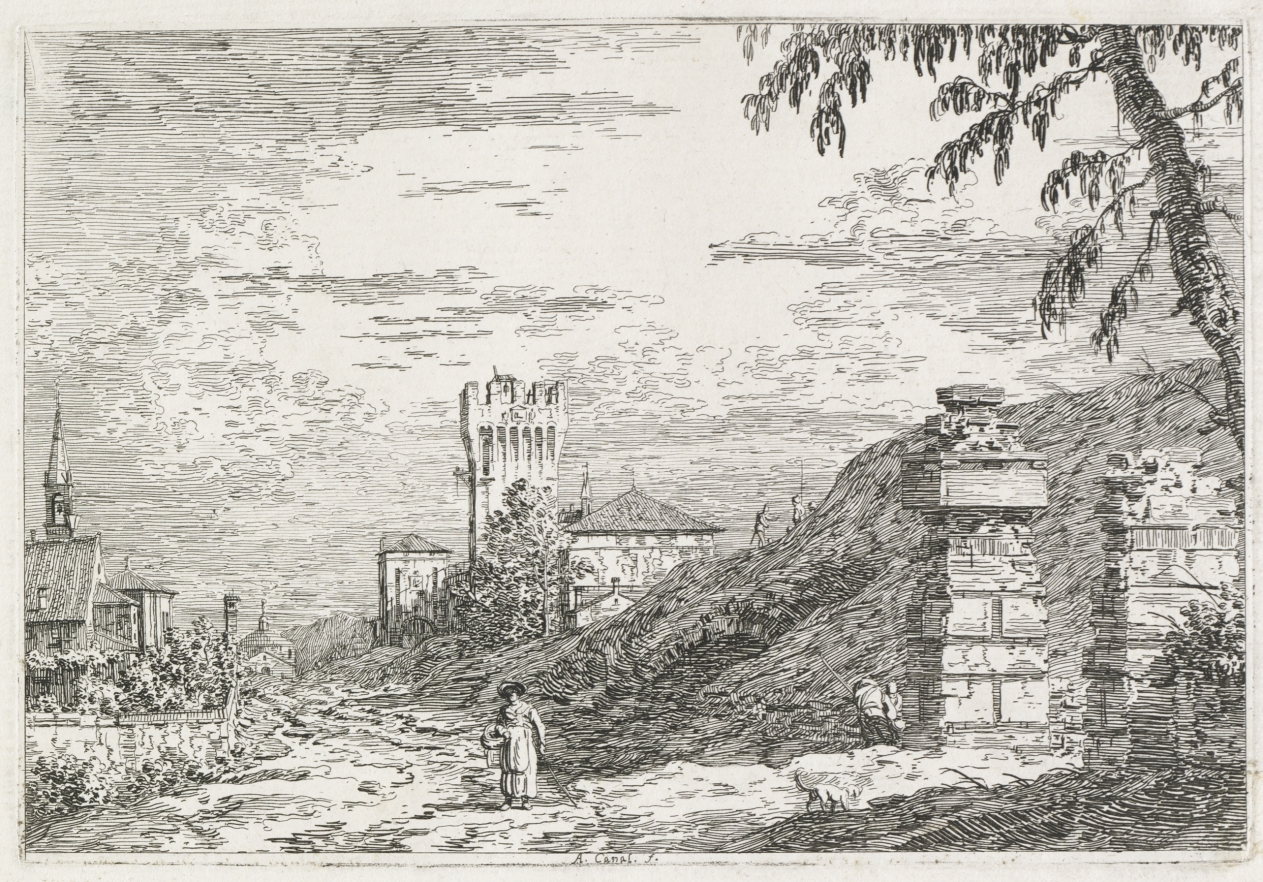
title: Views: Two Ruined Pillars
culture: Italy, Venice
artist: Antonio Canaletto (Italian, 1697–1768)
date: 1735–1746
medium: etching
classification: Print